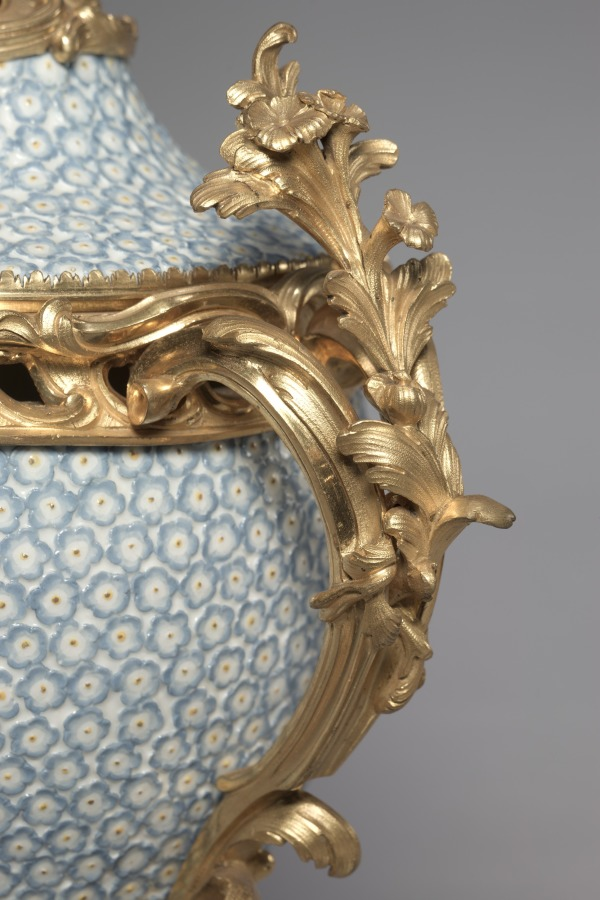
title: Vase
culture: Germany, Meissen, 18th century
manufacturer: Meissen Porcelain Factory (German, est. c. 1710)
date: 1749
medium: porcelain mounted in gilt bronze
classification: Ceramic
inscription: on obelisk located in one of the cartouche openings, the date 1749 appears.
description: One of these vases is dated 1749. They were perhaps part of a set of four covered vases that we know from documents were acquired by Mme. de Pompadour, mistress of Louis XV in 1752.